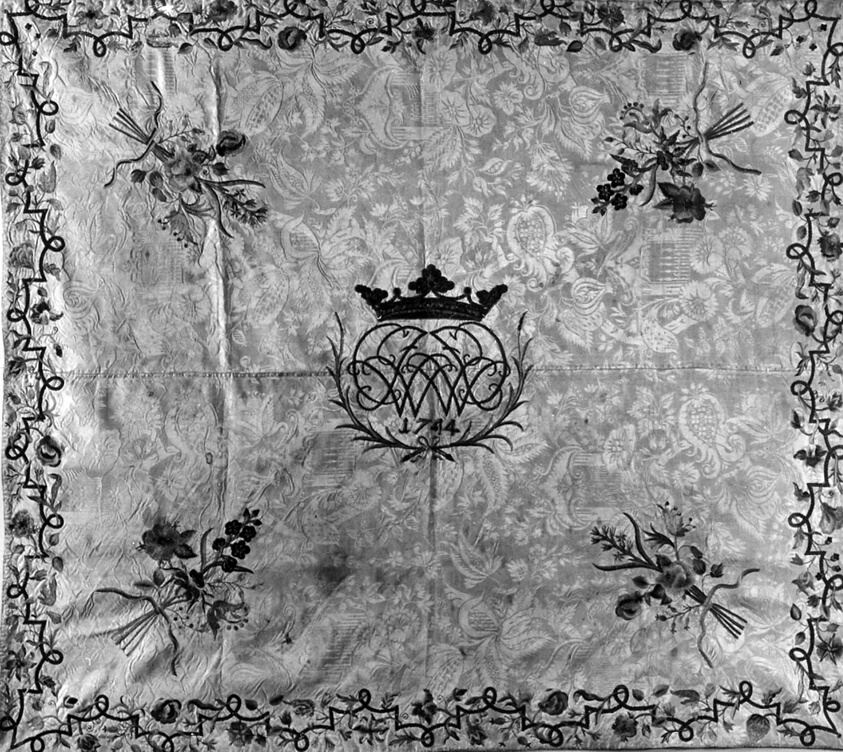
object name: Textile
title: Panel (Handkerchief ?)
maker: Italy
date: 1744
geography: Italy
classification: textile; needlework (visual works)